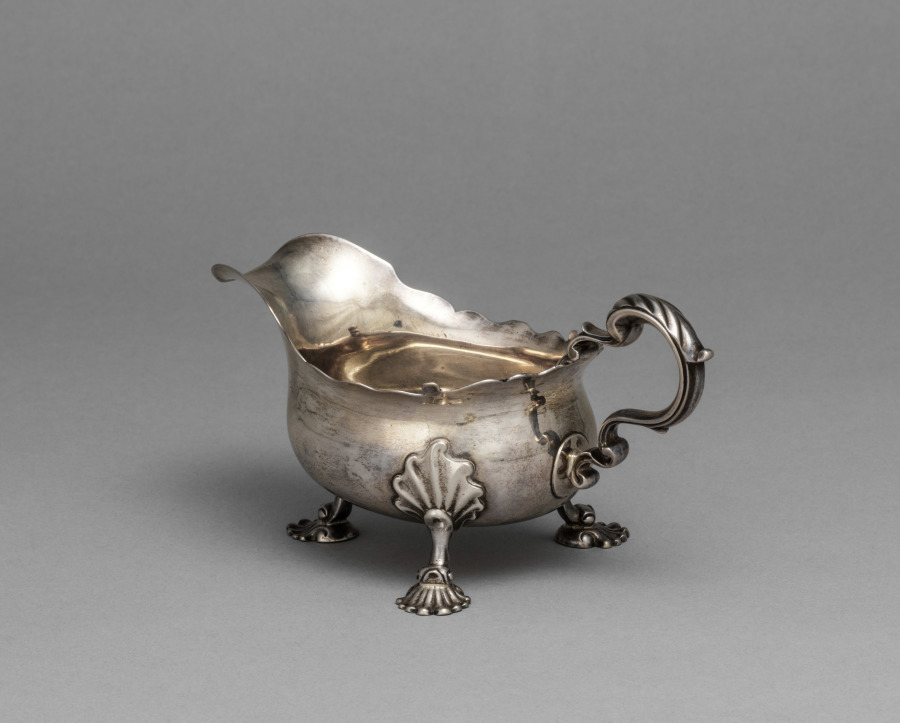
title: Gravy Boat (2 of 2)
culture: England, 18th century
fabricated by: Samuel Wood (British)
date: 1746–1747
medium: silver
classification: Silver